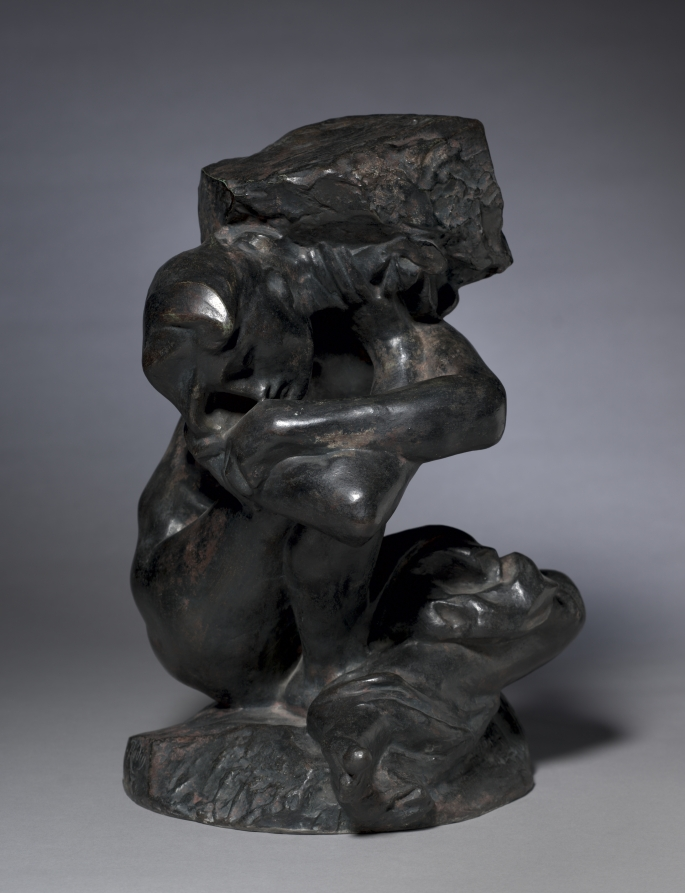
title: Fallen Caryatid Carrying Her Stone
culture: France, 19th century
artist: Auguste Rodin (French, 1840–1917)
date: 1880–81?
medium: bronze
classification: Sculpture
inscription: on base, right front: Alexis Rudier/Fondeur, Paris; left rear, on base: A. Rodin. Sticker on inside: P. Navez Exposition de Pittsburgh Caryatide Musée Rodin No. 764.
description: A caryatid is a column in classical Greek architecture carved to resemble a female figure. Rodin originally designed Fallen Caryatid Carrying Her Stone to serve as one of the figures on his monumental sculptural doorway The Gates of Hell. While Greek caryatids are typically draped, Rodin stripped the body of clothing and depicted the caryatid crushed under the weight of a stone, symbolically suggesting a state of physical suffering or emotional anguish. He exhibited Fallen Caryatid as an independent sculpture as early as 1883 and produced multiple versions in marble and bronze.